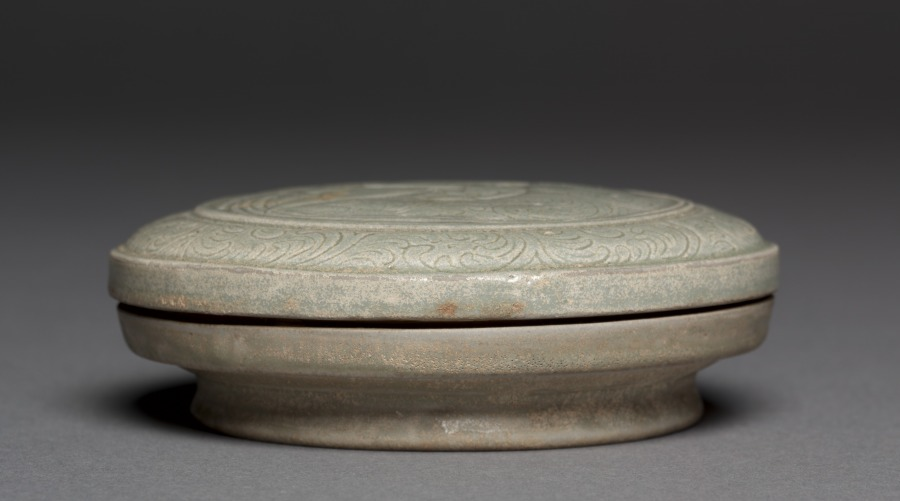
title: Covered Box: Yue Ware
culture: China, Shang-lin-hu kilns, Yu-yao District, Zhejiang province, Five dynasties (907-960)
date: 907–960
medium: glazed stoneware with incised decoration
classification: Ceramic